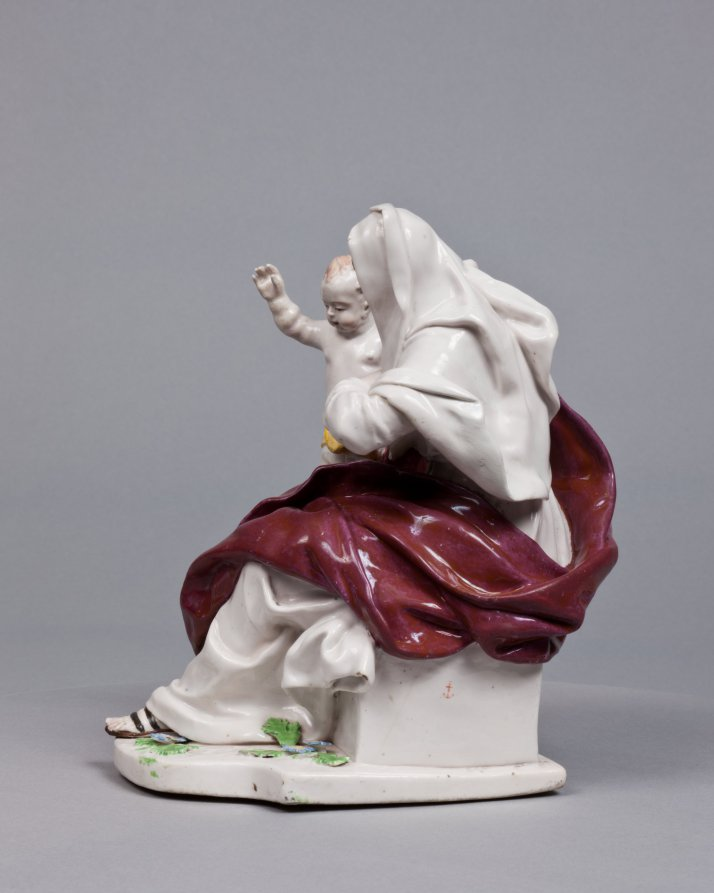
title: Madonna and Child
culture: England, Chelsea, 18th century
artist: Chelsea Porcelain Factory (Britain, London, 1745–84)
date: c. 1755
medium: porcelain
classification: Ceramic